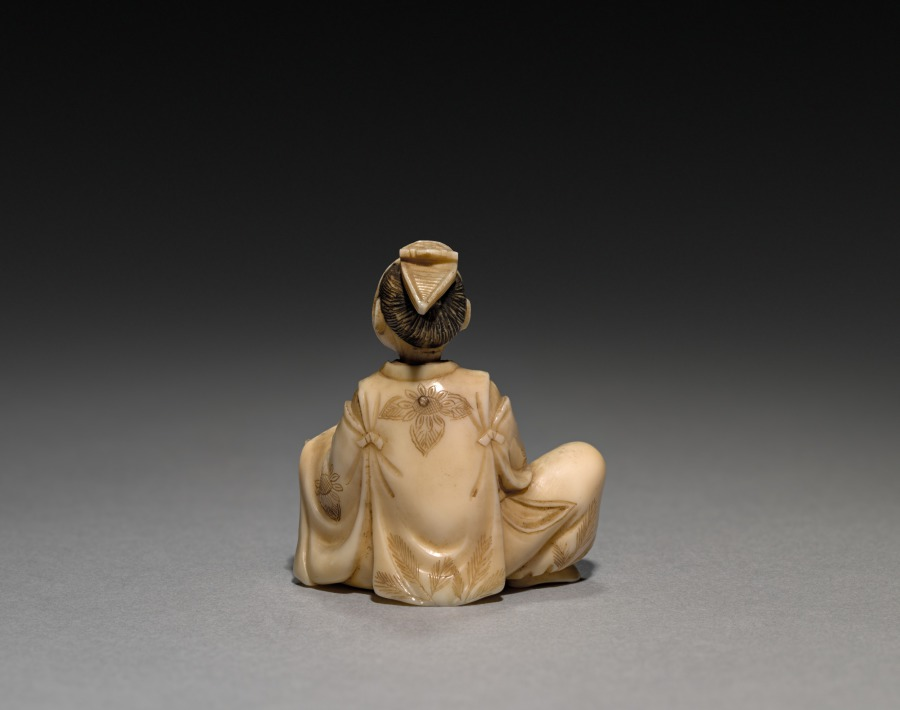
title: Man with a Drum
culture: Japan, Meiji period (1868–1912)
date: early 1900s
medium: ivory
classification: Netsuke